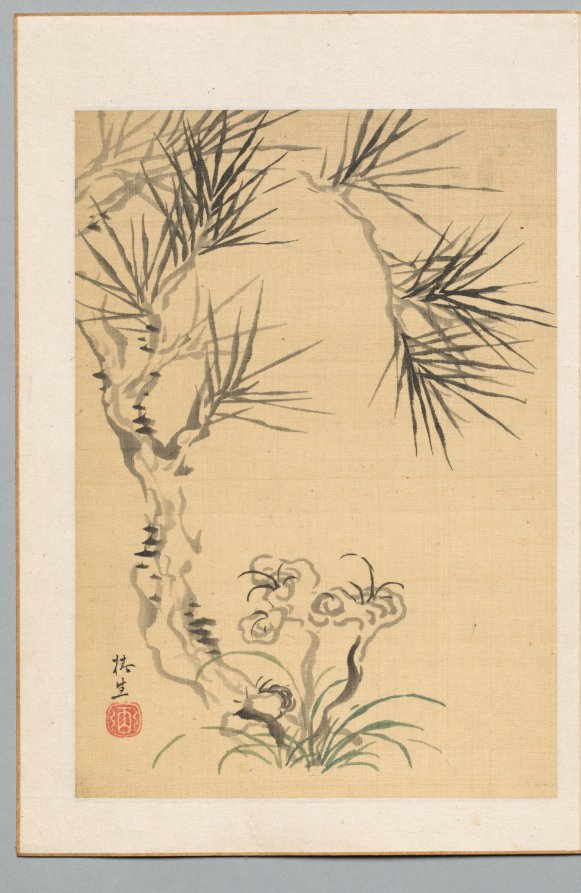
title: Pine Tree and Fungus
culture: Japan, Edo period (1615–1868)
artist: Tsubaki Chinzan (Japanese, 1801–1854)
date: early to mid-1800s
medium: leaf from a pair of folding albums; ink and light color on paper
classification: Portfolio